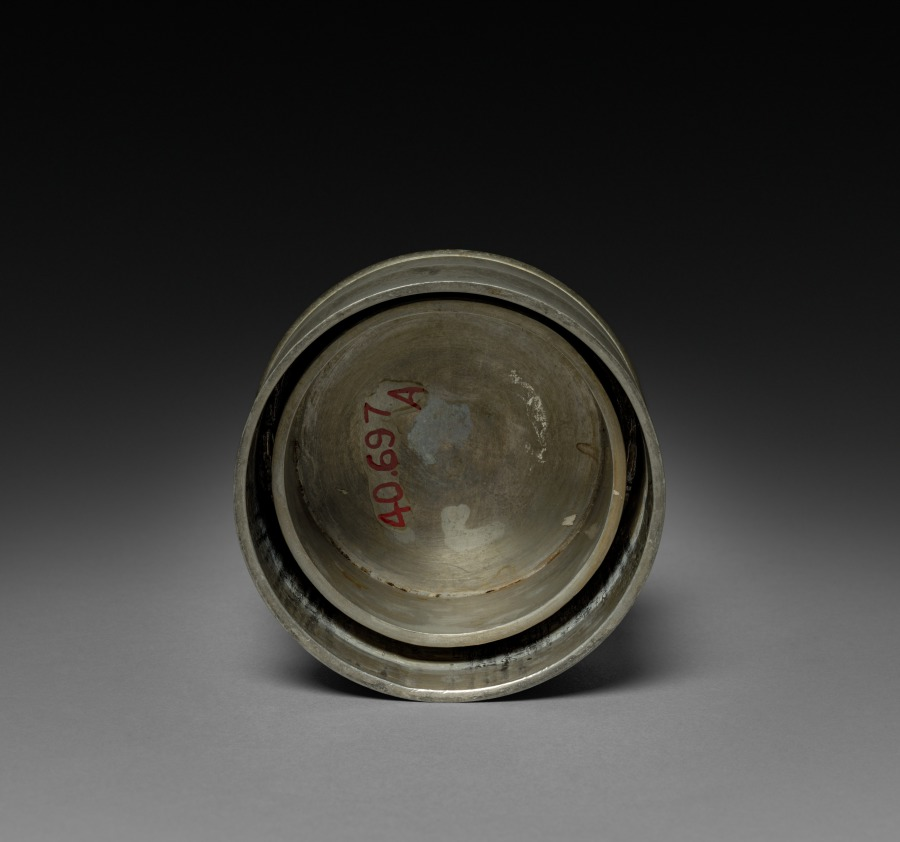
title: Jar (lid)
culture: Japan, Edo period (1615–1868)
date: 1600s-1800s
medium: pewter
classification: Metalwork